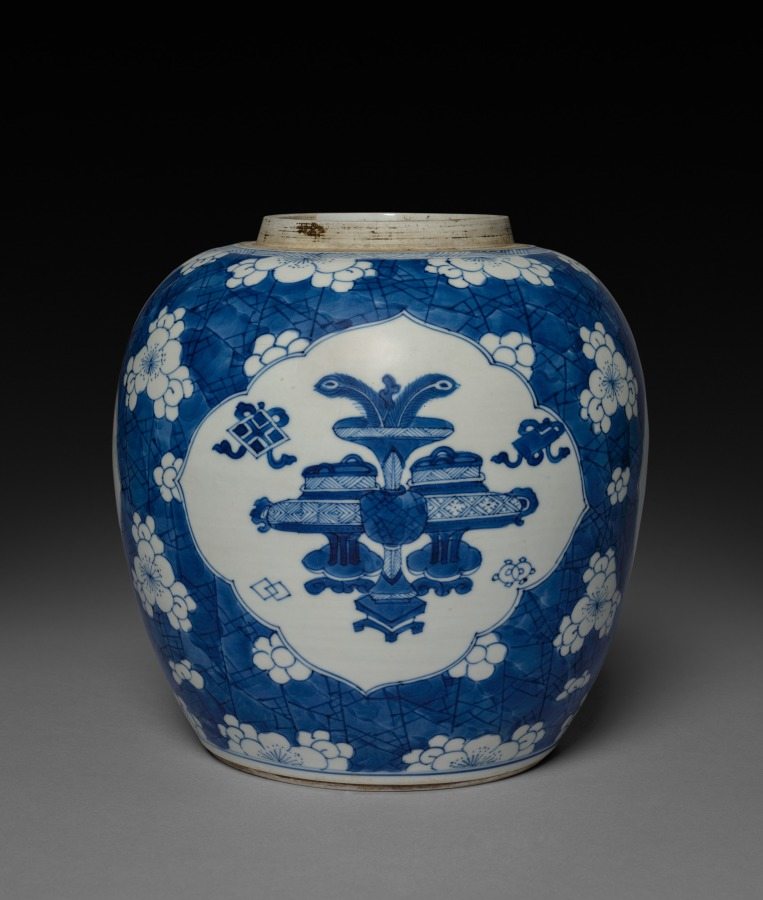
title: Ginger Jar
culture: China, Qing dynasty (1644-1911), Kangxi reign (1662-1722)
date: 1662–1722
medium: porcelain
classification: Ceramic